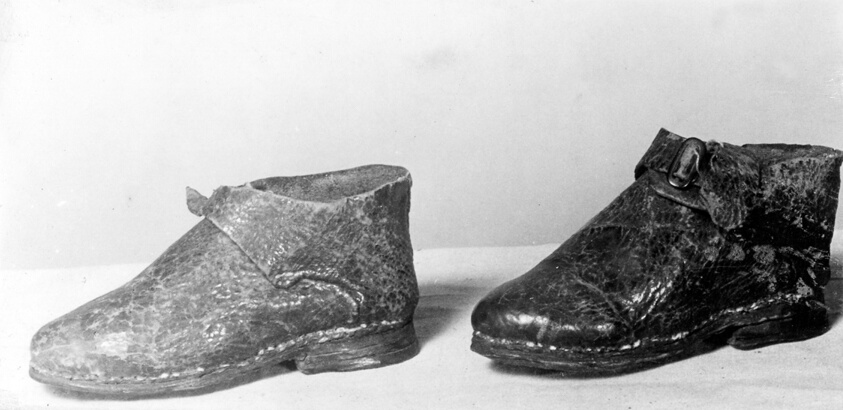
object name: Textile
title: Doll's Shoes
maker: England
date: 1775/1825, early 18th century style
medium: Black leather; white silk on paper embroidered with colored silk and silver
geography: England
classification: textile; shoes - misc; costume accessory - shoe